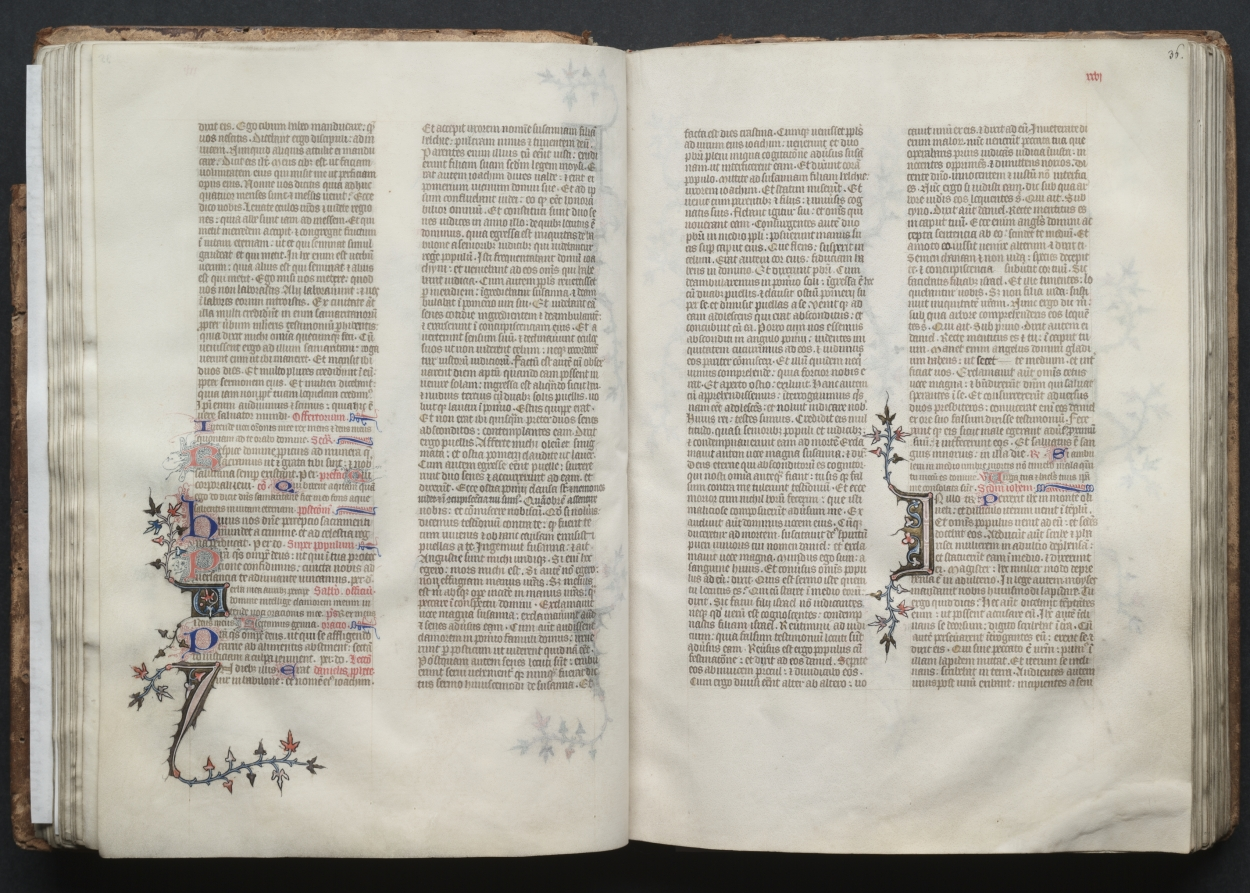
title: The Gotha Missal: Fol. 35v, Text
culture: France, Paris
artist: Master of the Boqueteaux (French)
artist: and Workshop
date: c. 1375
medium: ink, tempera, and gold on vellum; blind-tooled leather binding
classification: Bound Volume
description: The style and quality of this manuscript's decoration is typical of deluxe Parisian books made for aristocratic or royal patrons. Most of the book's decoration appears to be the work of the Master of the Boqueteaux, an artist active at the court of King Charles V (died 1380). His style was apparently shared by a number of book illuminators working in and around Paris. It is very possible that the Gotha Missal belonged to Charles V, but is not provable because the manuscript has no royal portraits and lacks a colophon. Given the book's magnificent decoration, however, it would seem that it was produced for a Valois prince, if not for the king himself. The manuscript receives its name from the German dukes of Gotha, its later owners.